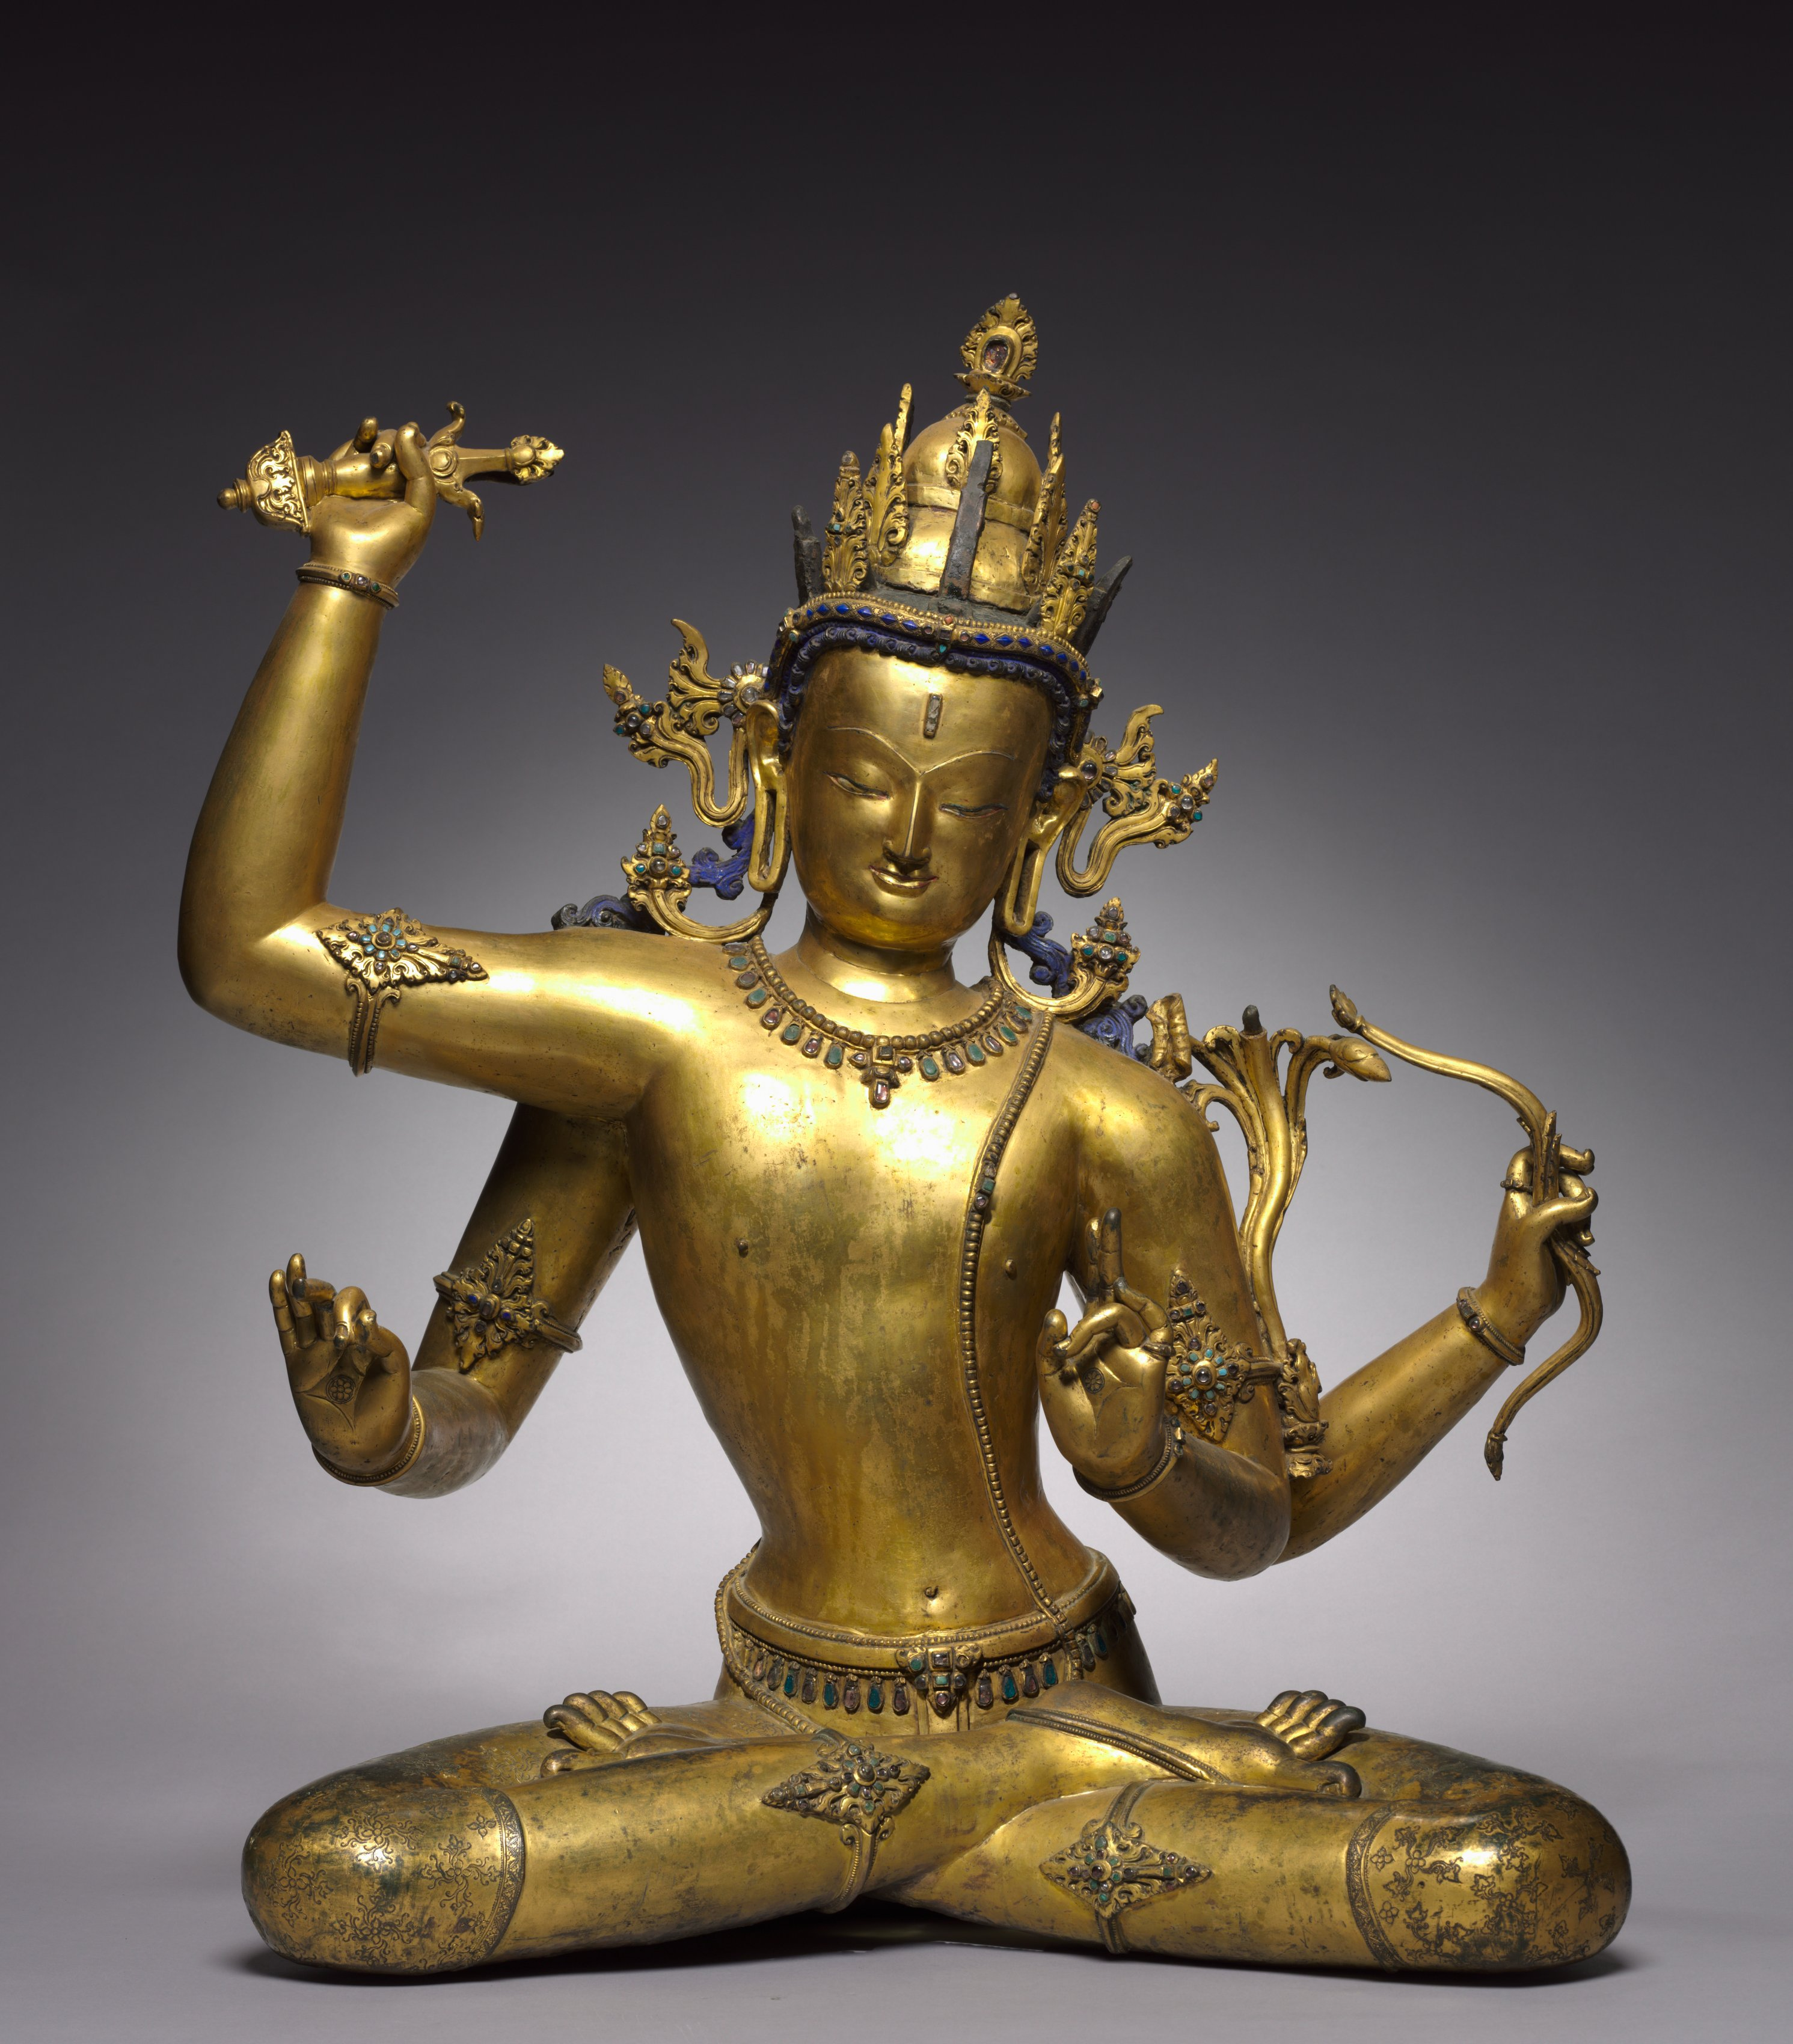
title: Bodhisattva of Wisdom (Manjushri)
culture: Nepal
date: 1400s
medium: Gilt bronze with precious and semiprecious stones, gum tempera, and cold gold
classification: Sculpture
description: This image depicts one of the main bodhisattvas, beings only one stage away from full enlightenment. Because the historical Buddha was a prince prior to his renunciation and life as a wandering ascetic, bodhisattvas are depicted as royal princes. This example has the sharp features, sweet expression, and crisp details characteristic of images made in Nepal during the 1400s. In his upraised right hand Manjushri holds the hilt of a sword that, like wisdom itself, metaphorically cuts through and defeats ignorance. His lower, rear left hand grasps a bow, once probably strung with a wire. Also missing is the arrow that he likely held in his lowered right hand. Arrows were often symbols for mantras, or strings of syllables thought to have the power to focus the mind and work like missiles to destroy negativity and affliction. The gesture of his lowered left hand indicates the transmission of Buddhist teachings. The lotus stem that rises at the left elbows originally held a book of sutras. This figure is in the yogic posture of meditation with the big toe flexed in concentration. Yoga is of central importance in tantric Buddhism, because high-level practitioners are able to discipline the body to such an extent that the mind can also be controlled.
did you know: The bodhisattva's short breeches are patterned in spiraling floral forms incised into the metal.